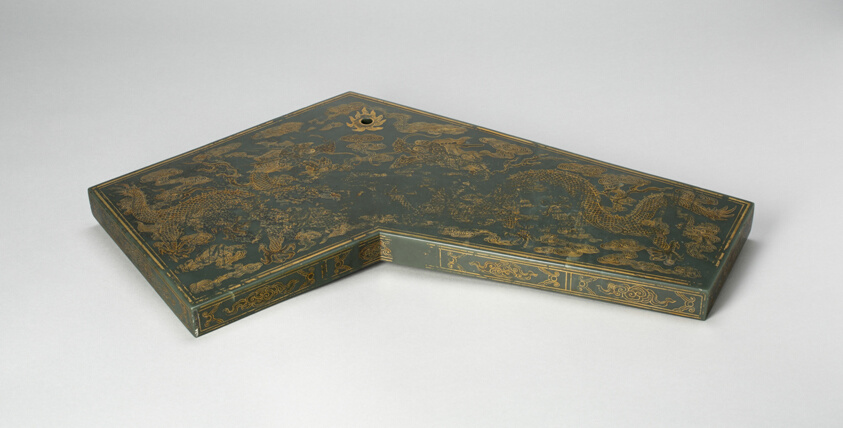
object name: Religious/Ritual Object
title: Musical Chime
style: Chinese (culture or style)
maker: China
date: Qing dynasty, inscribed and dated 26th year of Qianlong period (1761)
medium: Jade with gilt decoration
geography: China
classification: jade; asian art; ritual objects